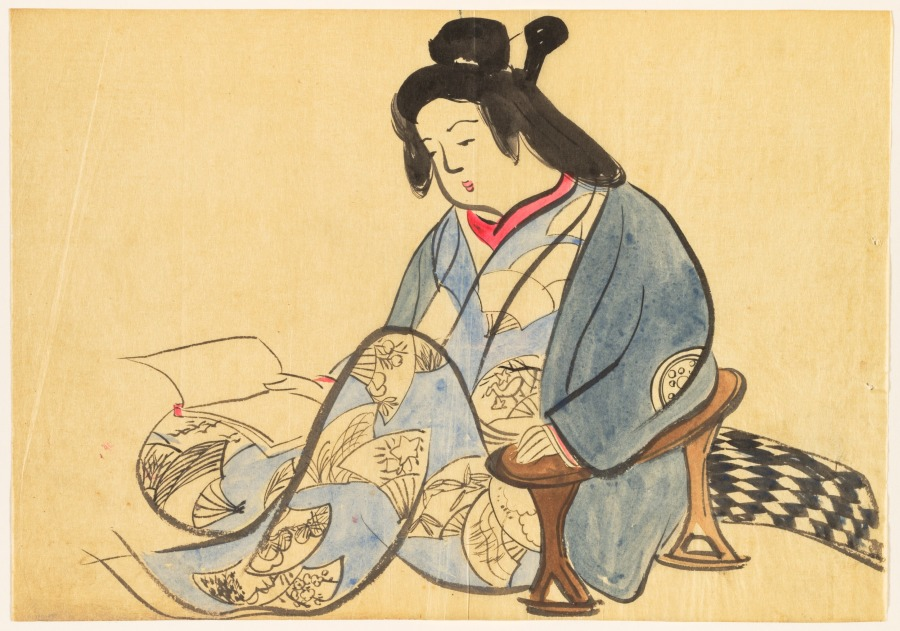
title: Flowers of a Hundred Worlds (Momoyogusa): Idleness (Tsurezure)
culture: Japan, Meiji period (1868–1912)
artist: Kamisaka Sekka (Japanese, 1866–1942)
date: 1909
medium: ink and color on paper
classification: Drawing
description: Kamisaka Sekka made preparatory drawings for his Flowers of a Hundred Worlds series on tracing paper with ink and color. The freehand sketches are much looser than the finished, printed compositions.